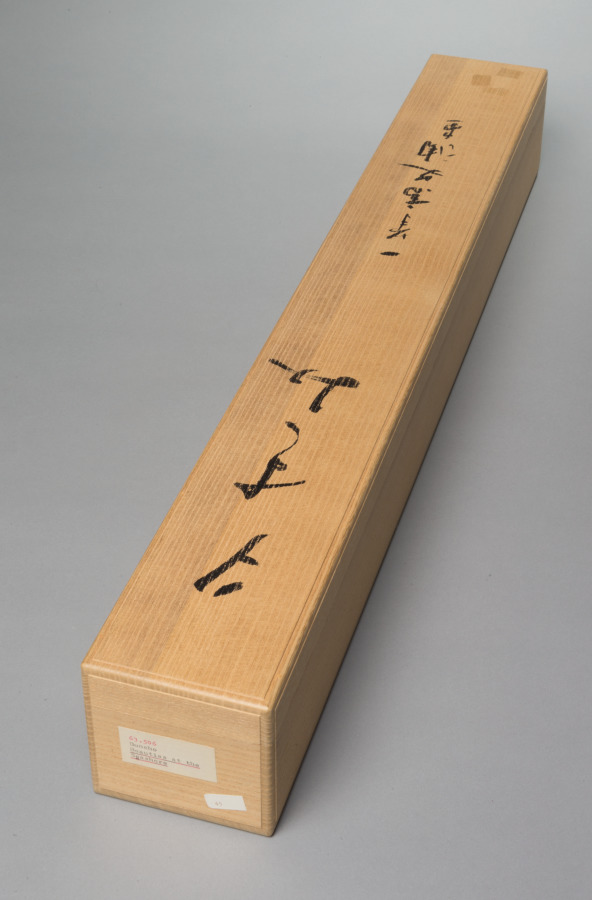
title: Beauties at the Seashore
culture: Japan, Edo period (1615–1868)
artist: Ippitsusai Bunchō (Japanese, active c. 1765–92)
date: c. 1765–92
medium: hanging scroll; ink and color on paper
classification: Painting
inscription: Undeciphered, severely faded seal in lower right corner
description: Bunchō portrays the popular subject of cooling off by the water on a late spring or early summer evening, as suggested by the willow. The seated lady enjoys her pipe-smoking—a popular pastime for Edo women. In the background, some fireworks are set off from a small boat.